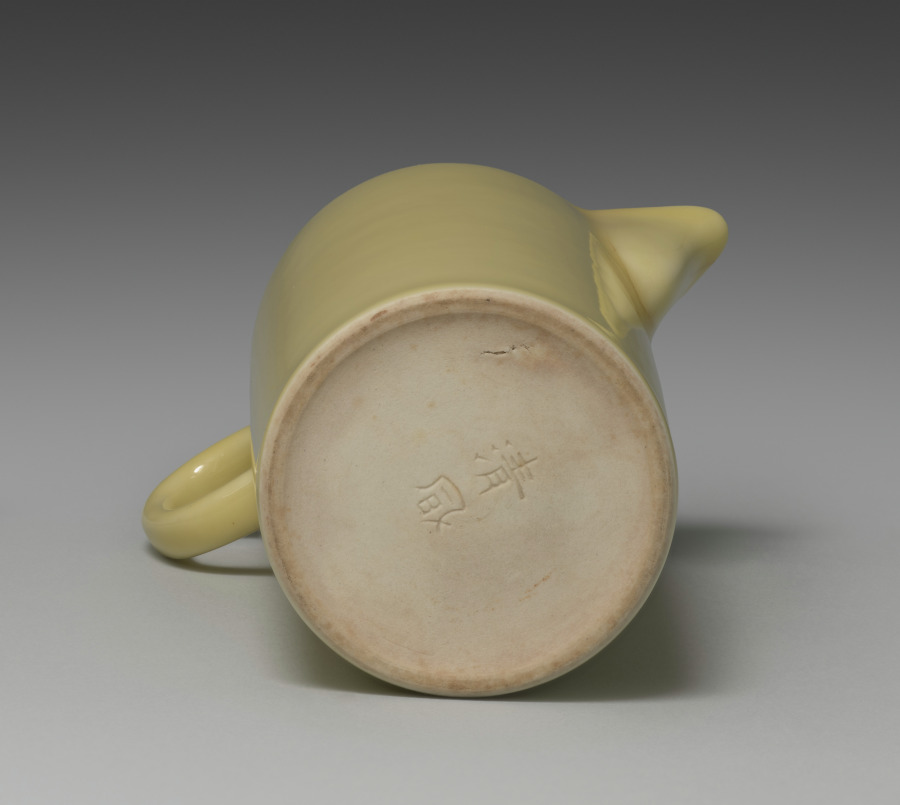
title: Sake Pourer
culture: Japan, Taishō period (1912–26) or Shōwa period (1926–89)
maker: Seifū Yohei IV (Japanese, 1872–1951)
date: 1914–46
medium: Porcelain with yellow glaze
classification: Ceramic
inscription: 清風造 。 【印】 清風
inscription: 成山清風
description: Like his father, Yohei IV also produced works with red or yellow monochrome glazes. His yellow-glazed works include this pair of sake pourers, a set of five drinking cups CMA 2022.217, and a sweets bowl molded into the shape of a chrysanthemum CMA 2022.218.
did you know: The lid's handle is made of bamboo.